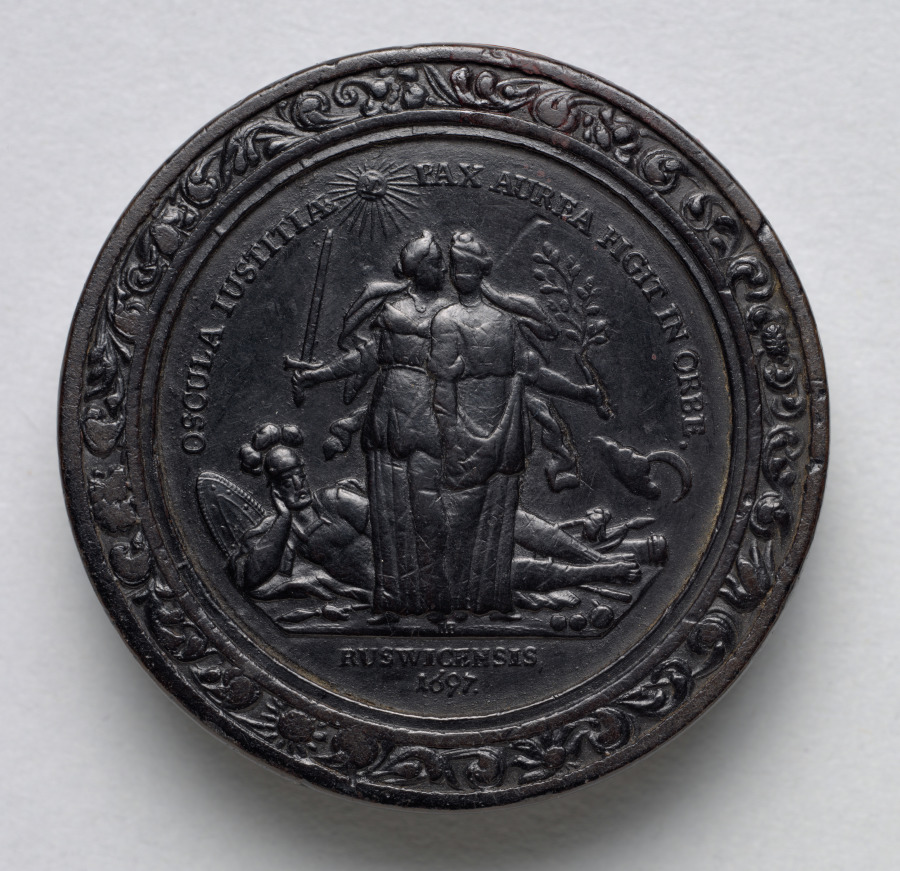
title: Gaming Piece (reverse)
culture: Germany, late 17th-early 18th Century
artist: Martin Brunner (German, 1659–1725)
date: c.1700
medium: wood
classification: Furniture and woodwork